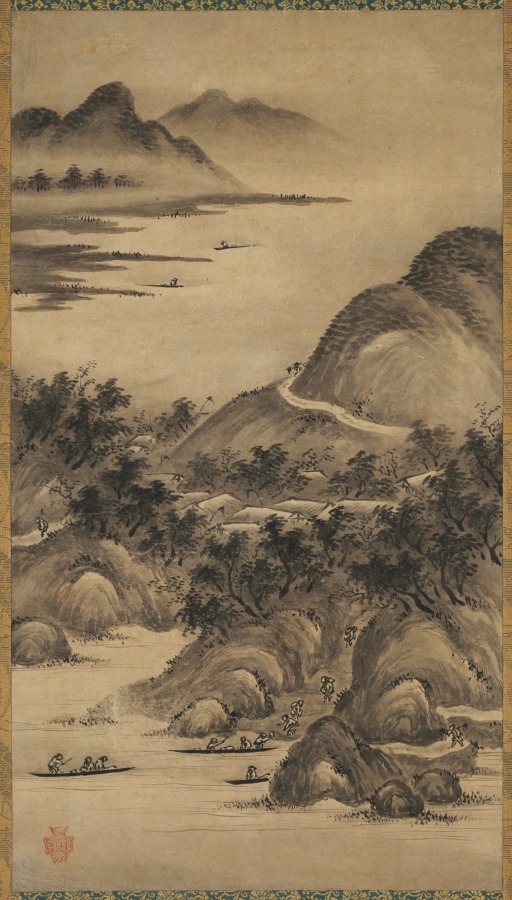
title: Seasonal Landscapes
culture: Japan, Muromachi period (1392–1573)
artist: Kano Hideyori (Japanese, active mid- to late 1500s)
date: mid- to late 1500s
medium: hanging scroll; ink on paper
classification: Painting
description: Now comprising three scrolls, this composition was originally a set of four paintings depicting the seasons. The set is among the most important of the artist’s surviving works. Each painting was executed in the gyō mode, indicating a speedy brush with rounded strokes. The terms shin (formal), sō (cursive), and gyō (semicursive), borrowed from calligraphy terminology, are terms commonly used by connoisseurs to describe brushwork in ink paintings.